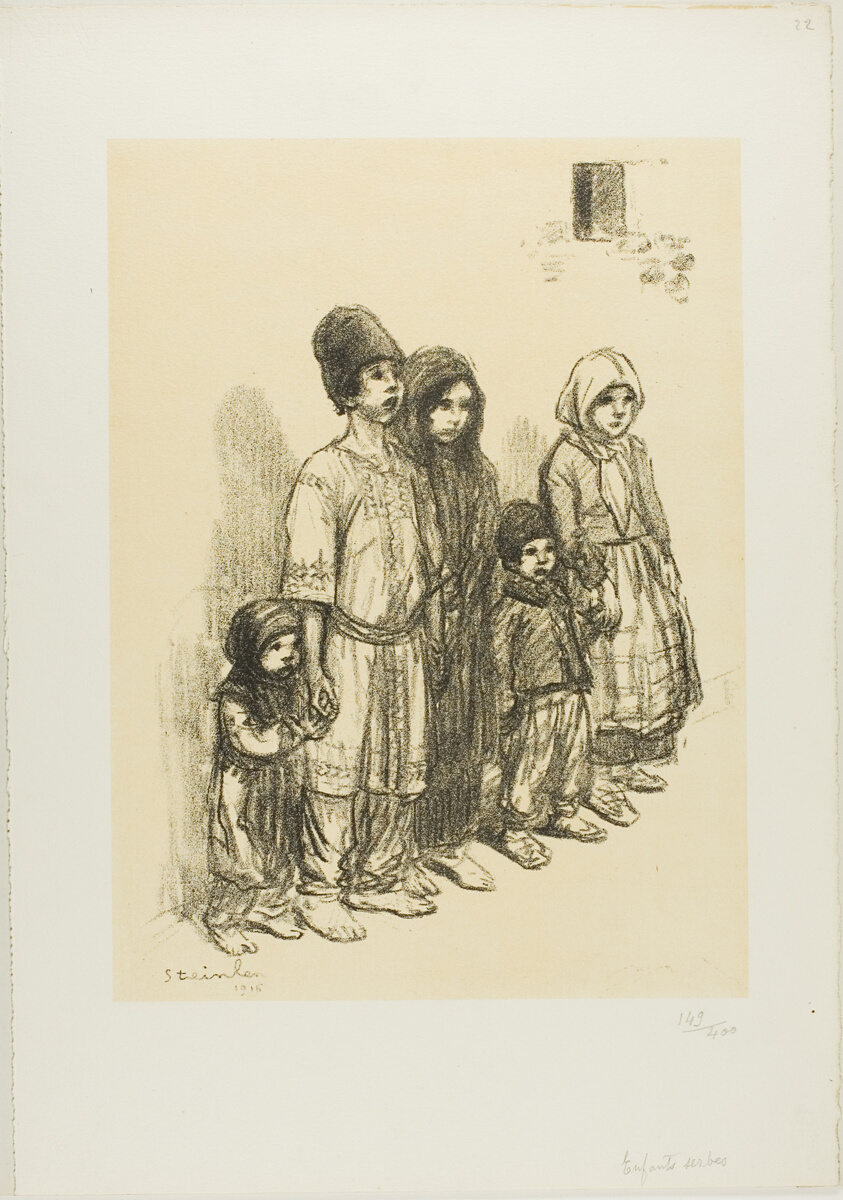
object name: Print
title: Serbian Children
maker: Théophile-Alexandre Steinlen; French, born Switzerland, 1859-1923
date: 1915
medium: Lithograph in black over fawn tint on thick off-white wove paper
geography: France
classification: lithograph; print; prints and drawing